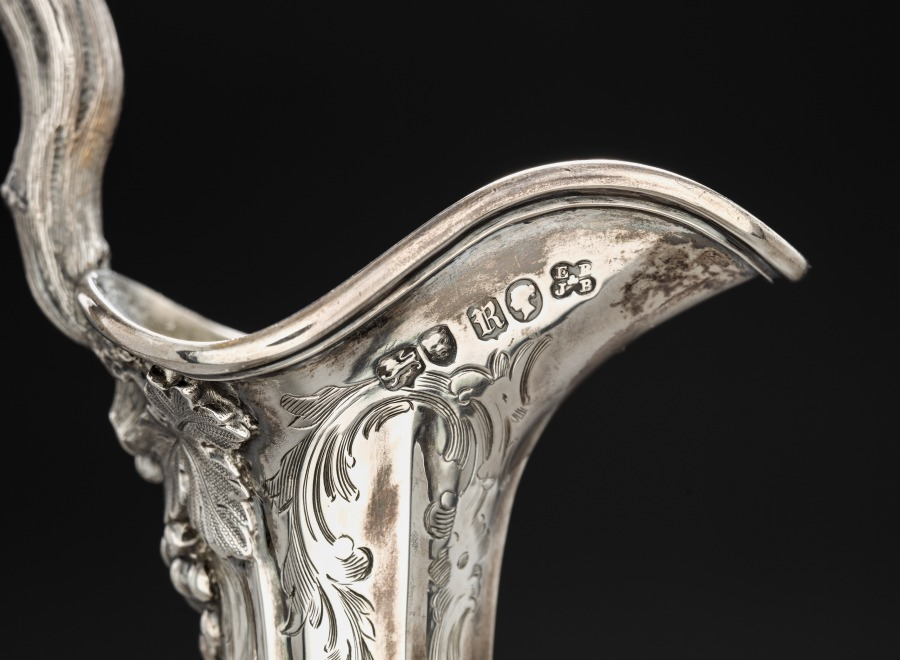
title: Pitcher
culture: England, 19th century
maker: Edward Barnard & Sons (British, c. 1680–2003)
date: c. 1870–80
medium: silver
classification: Silver